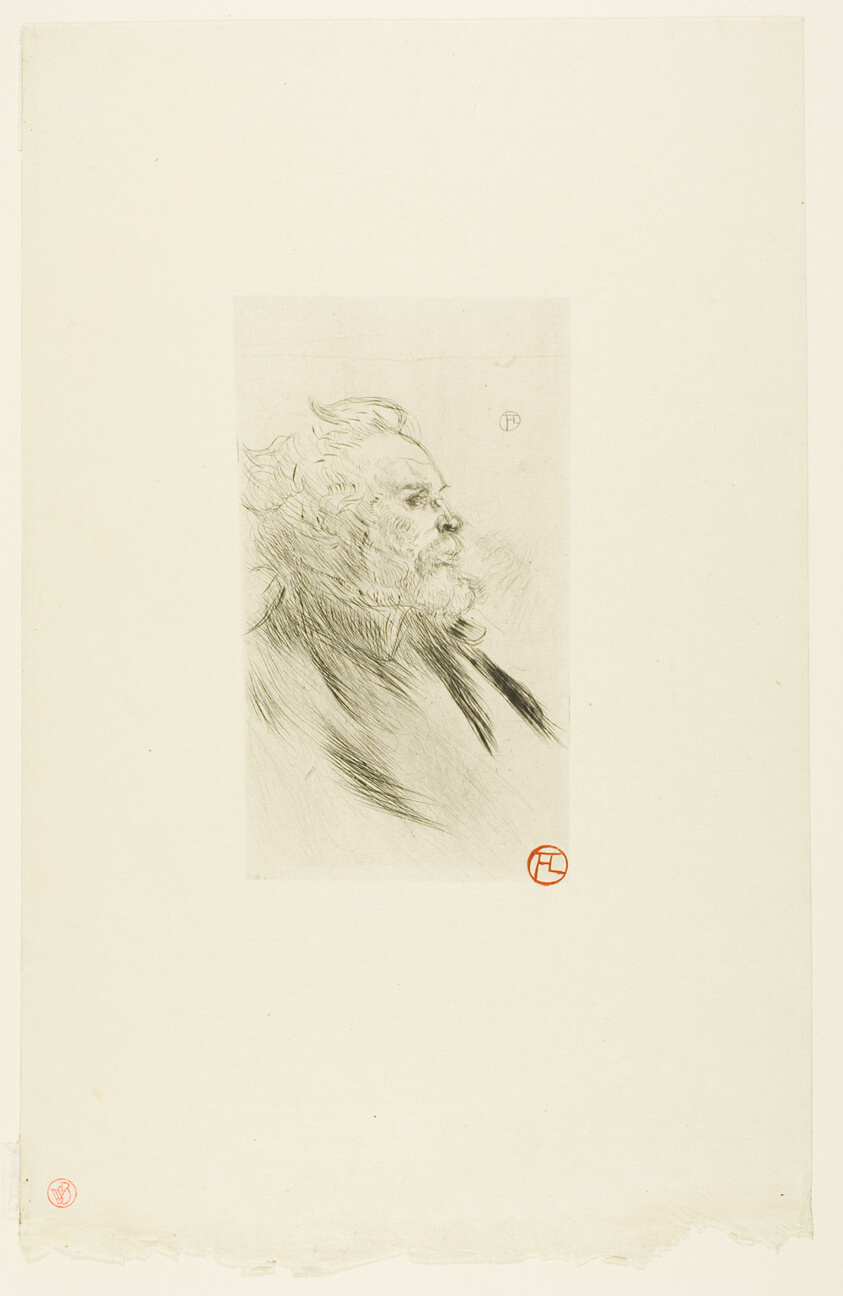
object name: Print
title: Charles Maurin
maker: Henri de Toulouse-Lautrec (French, 1864-1901)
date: 1898, printed and published 1911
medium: Drypoint from a zinc plate in black on cream laid Japanese paper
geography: France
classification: drypoint; print; prints and drawing